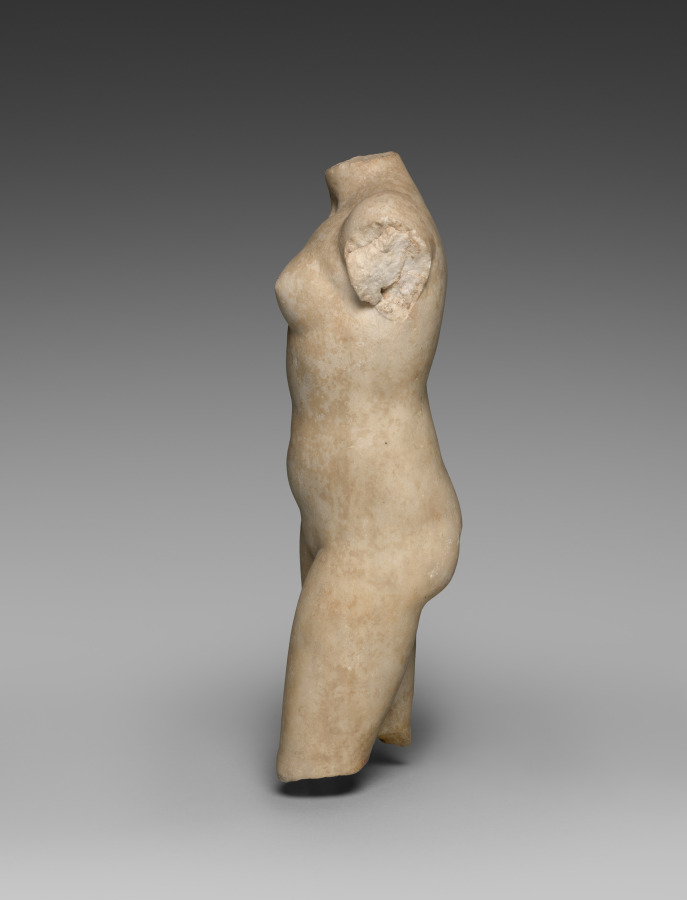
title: Torso of a Woman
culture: Italy, Roman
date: 100 BCE–400 CE, or modern, before 1927?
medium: marble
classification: Sculpture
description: Even without her head, limbs, or additional attributes, the nudity of this female statuette connects her to Aphrodite, goddess of love, or Venus, her Roman parallel. Female nudity was first realized in large scale in the mid-300s BC by the famous Athenian artist Praxiteles (395–330 BC), whose sculpture of Aphrodite was prominently displayed in a shrine in the city of Knidos (in present-day Turkey). For centuries thereafter, the female nude became a great favorite for Greek and Roman artists. The tradition continued into modern times, leading some to question the ancient origins of this sculpture.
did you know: The nudity of this female statuette connects her to Aphrodite or Venus, goddess of love.